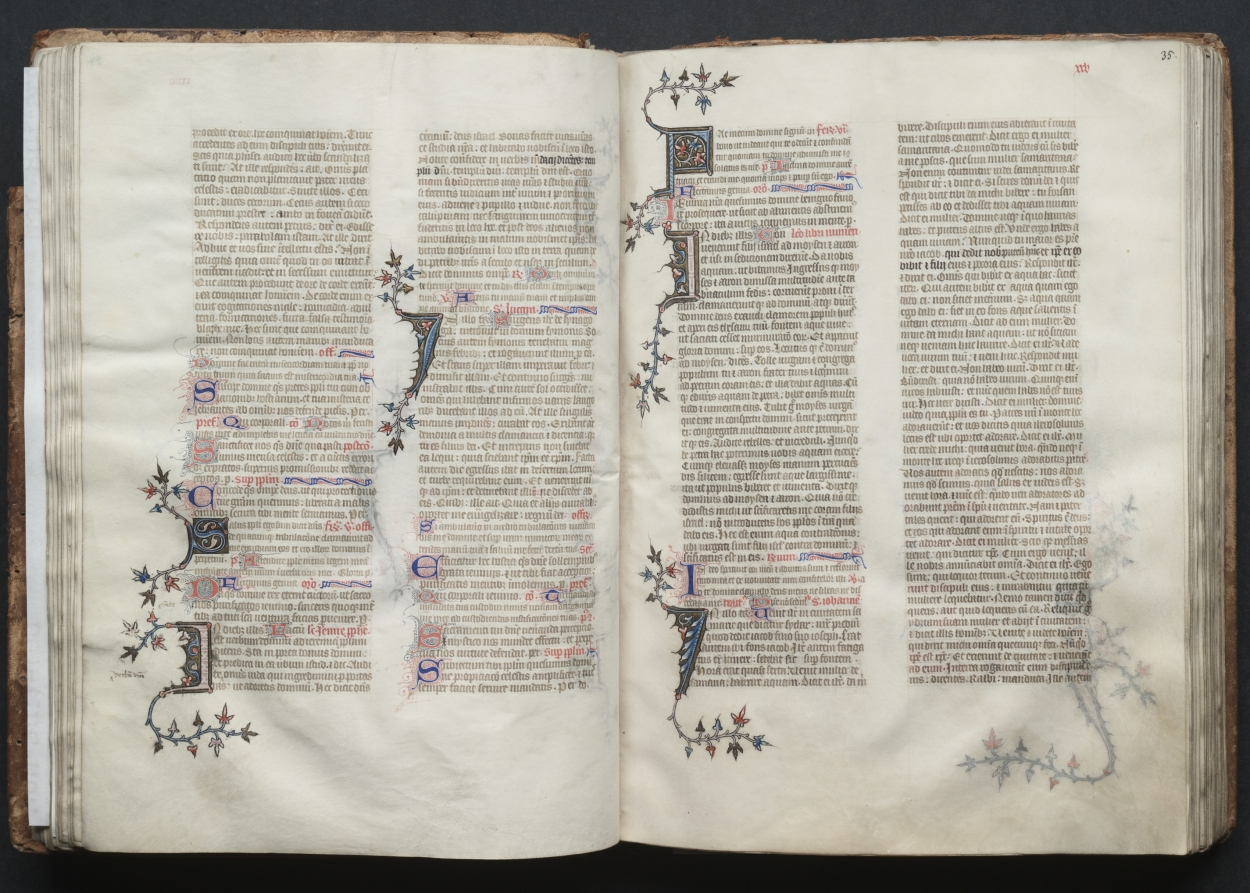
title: The Gotha Missal: Fol. 35r, Text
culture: France, Paris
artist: Master of the Boqueteaux (French)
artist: and Workshop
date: c. 1375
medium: ink, tempera, and gold on vellum; blind-tooled leather binding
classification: Bound Volume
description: The style and quality of this manuscript's decoration is typical of deluxe Parisian books made for aristocratic or royal patrons. Most of the book's decoration appears to be the work of the Master of the Boqueteaux, an artist active at the court of King Charles V (died 1380). His style was apparently shared by a number of book illuminators working in and around Paris. It is very possible that the Gotha Missal belonged to Charles V, but is not provable because the manuscript has no royal portraits and lacks a colophon. Given the book's magnificent decoration, however, it would seem that it was produced for a Valois prince, if not for the king himself. The manuscript receives its name from the German dukes of Gotha, its later owners.